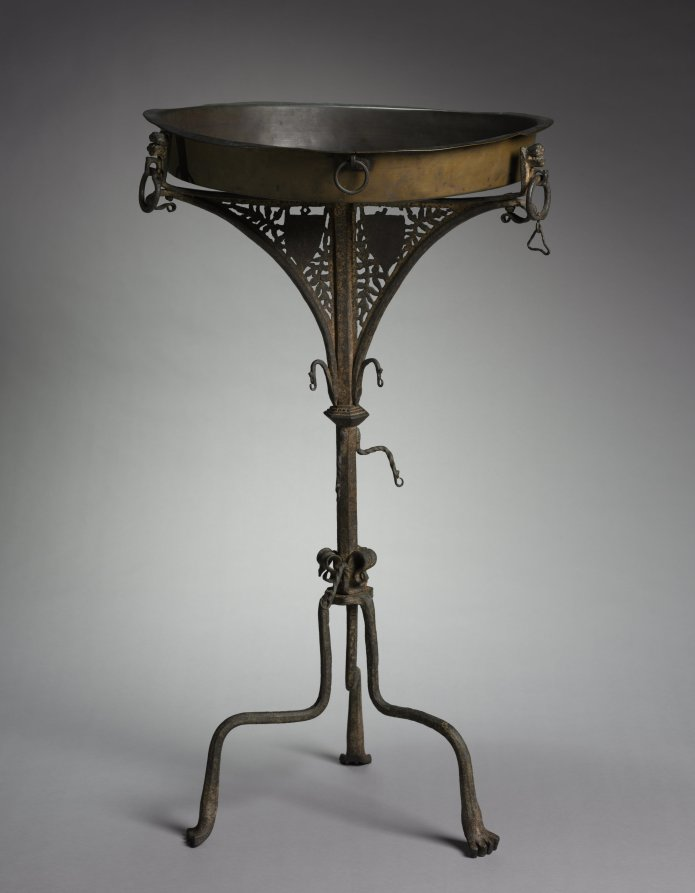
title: Tripod Brazier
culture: Italy, Siena(?)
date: c. 1400–1450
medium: wrought iron and copper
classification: Furniture and woodwork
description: Metal braziers were filled with hot coals and used to heat rooms. Similar braziers are often depicted in 15th-century paintings and frescoes, shown in use in childbirth scenes and in hospitals, infirmaries, and sick rooms. This brazier consists of a detachable coal pan and an ornate tripod stand. Such objects must have been considered necessary furnishings and therefore subject to decoration. They were portable and could be moved from room to room as needed.